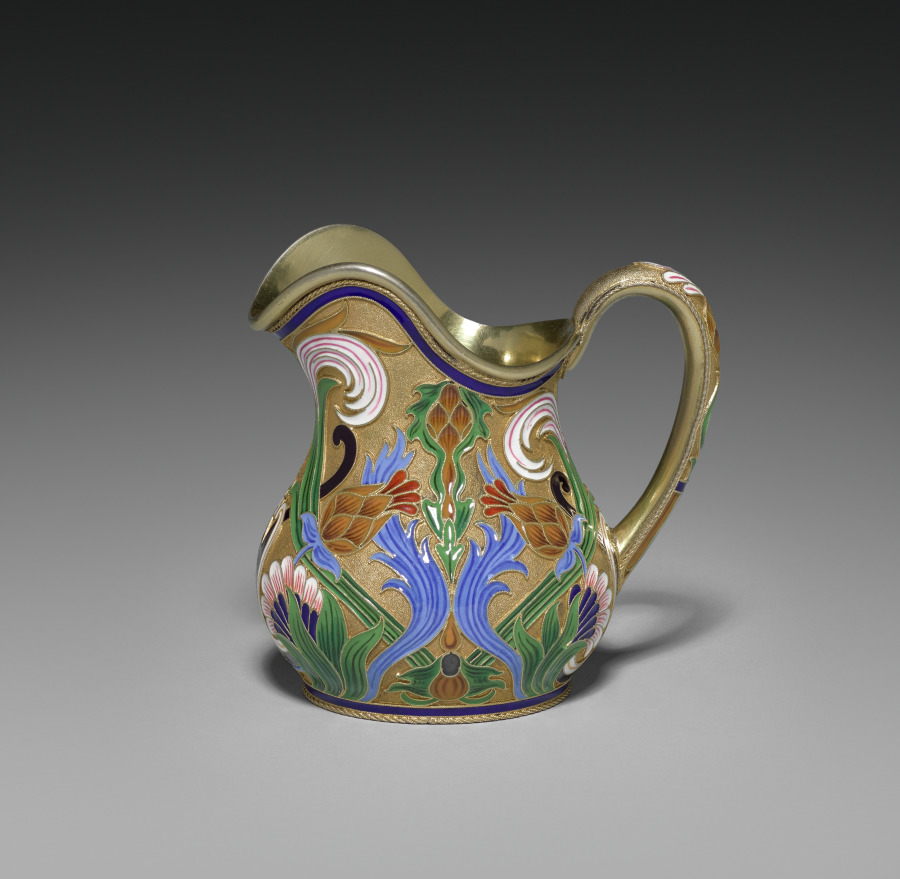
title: Creamer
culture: Russia, St. Petersburg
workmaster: attributed to Feodor Ivanovich Rückert (Russian, 1840–1917)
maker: House of Fabergé (Russian, 1842–1918)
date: 1887–96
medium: silver gilt, opaque cloisonné enamel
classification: Miscellaneous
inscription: 88, St. George [assay mark for Moscow, 1882-1896]; C. Fabergé (in Cyrillic); double-headed eagle [imperial warrant]; 10593 scratched.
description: Fabergé’s craftsmen in Moscow, especially under the watchful eye of workmaster Feodor Rückert, became known for their work in the Pan-Slavic or Neo-Russian style, hearkening back to 17th-century motifs of Russian folk art. Often on rather conventional shapes, Rückert and his silversmiths created an explosion of color, achieved through the historic technique of cloisonné enamel in which tiny metal lines are soldered to the surface then filled with glass powders in various colors and fired to create a high gloss finish. The result is a spectacular evocation of the 17th-century originals. Far from mere copies, however, Rückert's designs, such as this tea service, employ naturalistic or abstract motifs in a thoroughly modern adaptation of a remarkable earlier period of Russian art and decoration.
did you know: This creamer is part of a larger tea service.